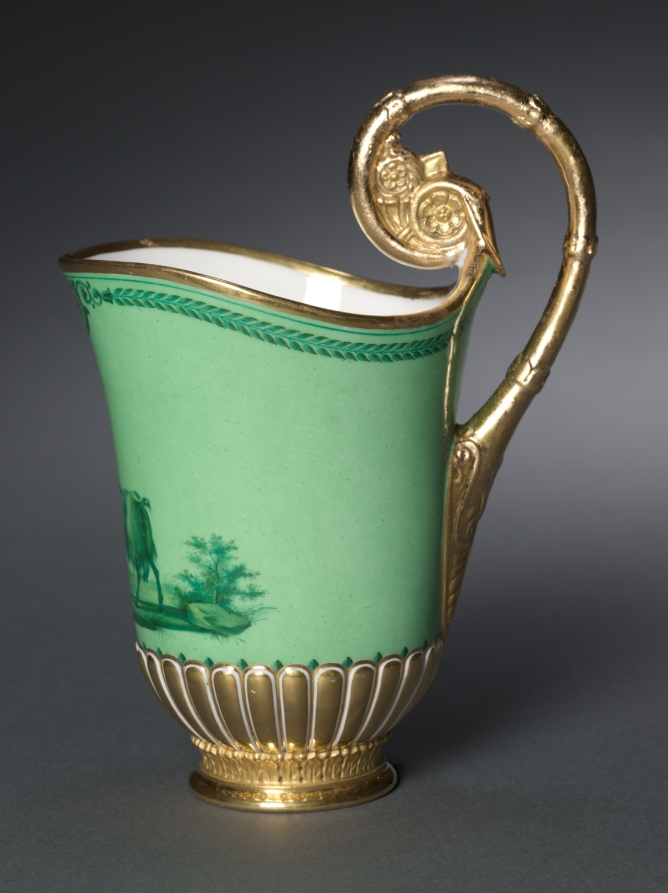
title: Cream Jug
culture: France, 18th-19th century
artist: Sèvres Porcelain Factory (French, est. 1756)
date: designed 1788, made 1831–1834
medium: gilt porcelain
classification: Ceramic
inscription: R...R(?)-34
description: The pattern for this cream jug was originally designed for Marie-Antoinette, queen of France, in 1788